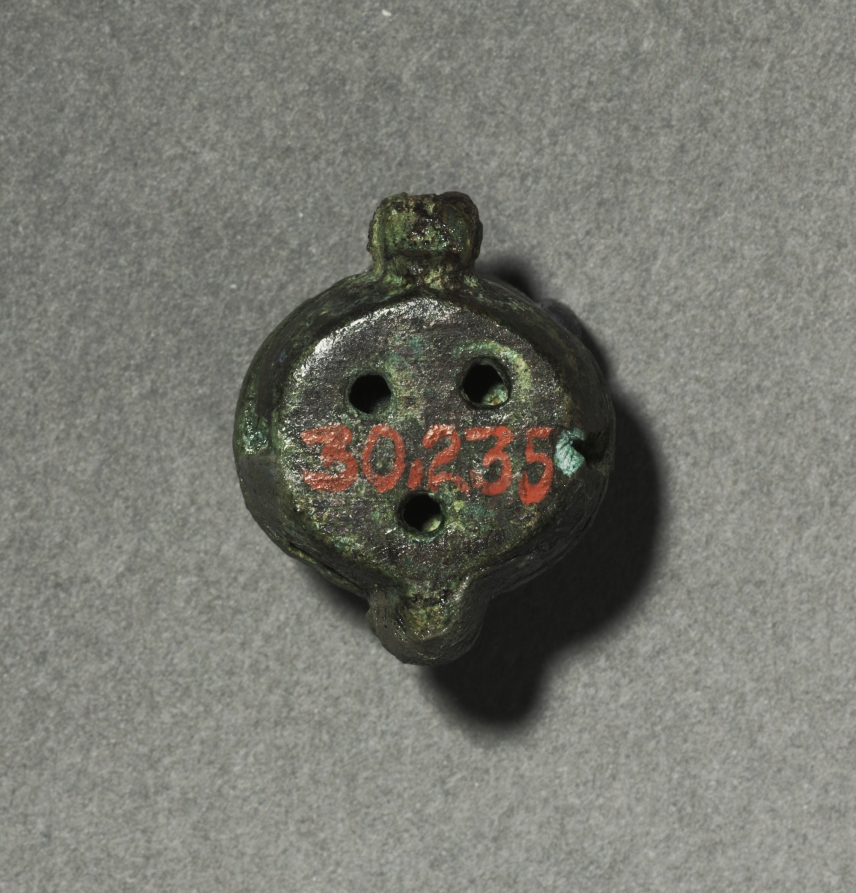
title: Ornamental Brooch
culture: Gallo-Roman or Romano-British, Migration period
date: c. 100–300 CE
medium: bronze and champlevé enamel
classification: Jewelry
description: These brooches functioned as garment clasps (much like the generally larger fibulae) and are distinctive for their decorative enamels. The art of enameling was highly popular among the conquered peoples who lived on the outskirts of the Roman empire, chiefly the Celts and the Gauls. Though the enameling technique was practiced by the Romans themselves on small objects, the brightly colored decoration readily appealed to "barbarian" taste. By the AD 200s, enameled brooches like these were being made in abundance by the native peoples of Britain and Gaul (modern France and Belgium).